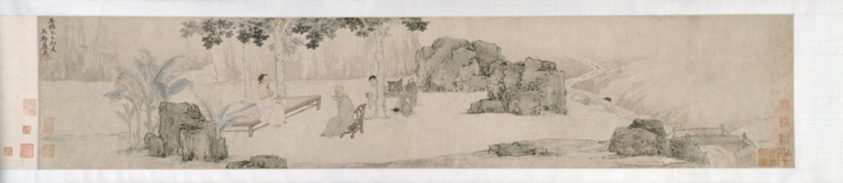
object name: Painting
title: Tea Drinking Under the Wutong Tree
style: Chinese (culture or style)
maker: Tang Yin 唐寅 (Chinese, 1470-1523)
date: Ming dynasty (1369–1644), 1509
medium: Handscroll; ink and slight color on paper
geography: China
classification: painting; asian art